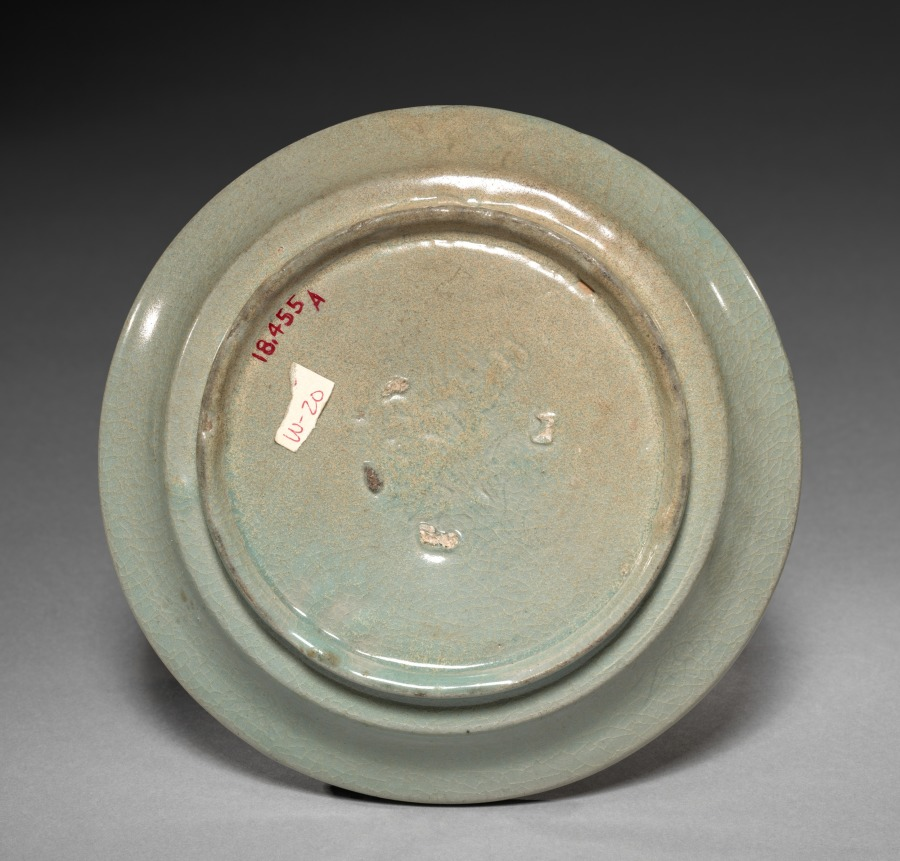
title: Saucer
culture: Korea, Goryeo dynasty (918–1392)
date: 1100s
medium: pottery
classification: Ceramic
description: As early as the seventh century, the practice of drinking tea and wine became an important part of elite culture in Korea. Elites of the Goryeo period commissioned a variety of types of utensils and vessels including this saucer paired with a large bowl, to make their drinking experience more exciting.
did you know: The crackle pattern that appears all over this saucer was caused by a thermal expansion mismatch between the body and the glaze.